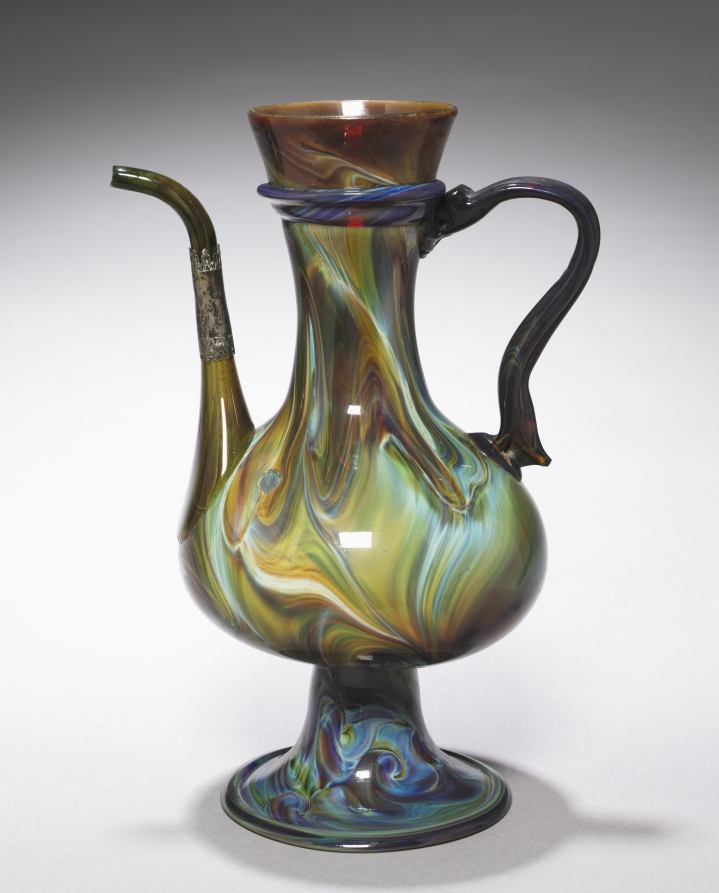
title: Ewer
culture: Italy, Venice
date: c. 1500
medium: "Chalcedony" inlaid glass; silver mount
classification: Glass